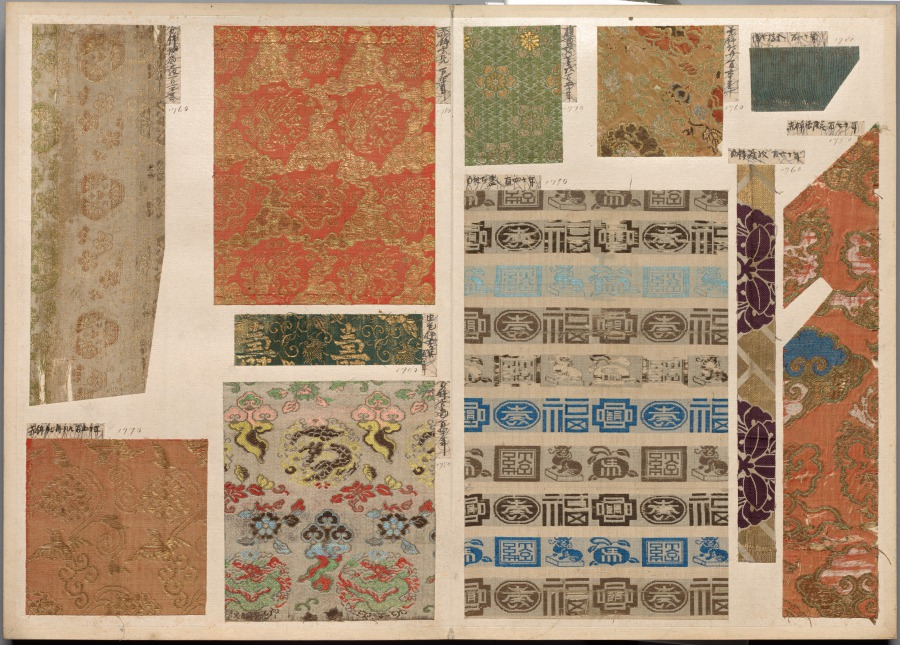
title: Album of Textile Samples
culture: Japan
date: 1790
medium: silk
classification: Textile